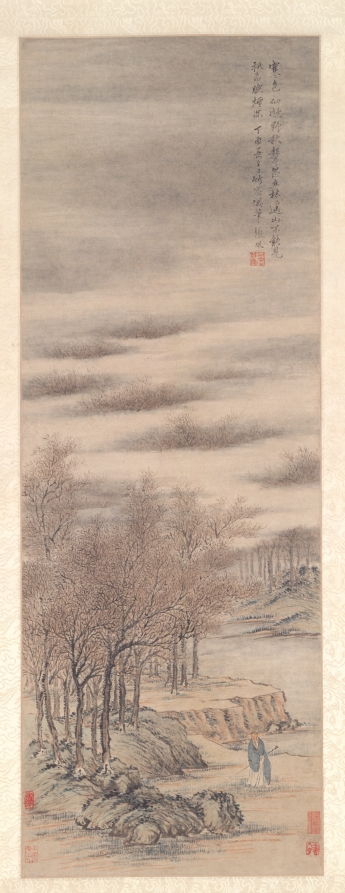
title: Listening to the Sound of Autumn in a Misty Grove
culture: China, Qing dynasty (1644-1911)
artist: Zhang Feng (Chinese, active c. 1632–1662)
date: 1657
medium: Hanging scroll; ink and color on paper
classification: Painting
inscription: Artist's inscription, signature, and 2 seals: Frosty colors have just appeared throughout the countryside,/ Autumn sounds echo unexpectedly through the trees./ The distant mountains cannot be seen,/ As the evening mist spreads, thicker and deeper./ Casually painted at the bamboo window on the solstice day of the dingyou year [1657]. Zhang Feng. [seal] Feng. [seal, lower left corner] Shangyuan Laoren. (Translation by LYSL/HK/WKH)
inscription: 3 additional seals: 1 of Fa Liang (Qing Dynasty); 2 unidentified.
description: Zhang Feng from Nanjing passed the local government examinations shortly before the fall of the Ming dynasty. With the Manchu conquest, he joined the ranks of loyalists who refused to serve the new regime. He chose the intermittently frugal life of a Buddhist adept. Many of his paintings lament the loss of the empire. In this scroll, he depicts a lone figure in a stark landscape of frosty atmosphere enshrouded in mists. Close looking reveals red strokes that color the grounds, a way of expressing his loyalty to the Ming whose family name Zhu means red.